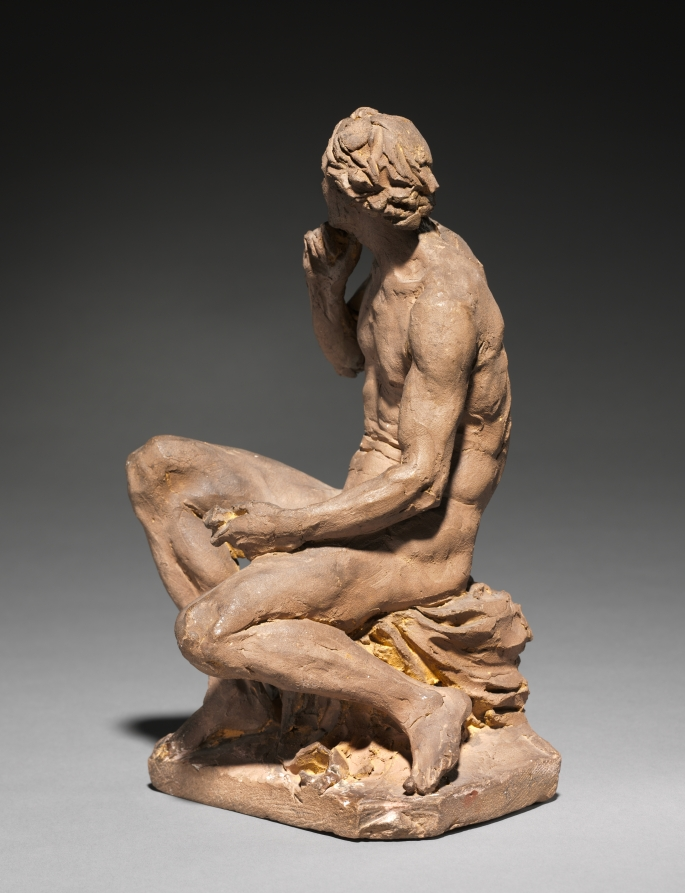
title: Study for "Silence"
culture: France, 18th century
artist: attributed to Louis-Philippe Mouchy (French, 1734–1801)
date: c. 1780–89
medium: terracotta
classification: Sculpture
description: When originally acquired this work was understood as a sketch for the "Citizen," a figure for a monument to King Louis XV in the French city of Rheims by Jean-Baptiste Pigalle. In that work the figure of the "Citizen" appears at the base, opposite an allegory of law, underneath a sculpture of Louis XV. The attribution was changed, however, after research made evident that the museum's sculpture precisely matches the iconography for "Silence." Moreover, the figure differs considerably from Pigalle's final figure of the "Citizen," throwing the attribution to Pigalle in question as well. The work is now believed to be by Pigalle's close follower, Mouchy, because of its similarity to a sculpture completed in 1789 for Madame Pompadour called Silence, which currently resides in the Luxembourg Palace in Paris.